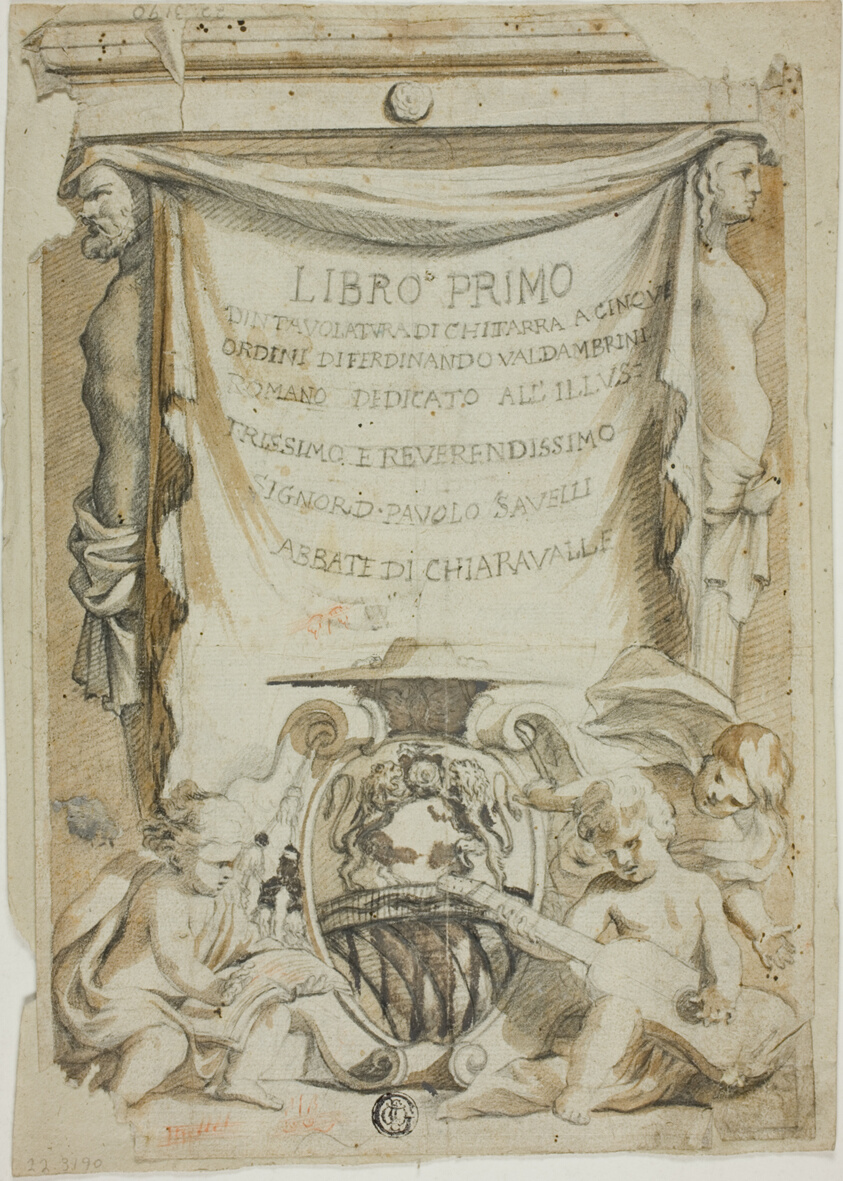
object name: Drawing and Watercolor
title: Design for Title-Page for Guitar Manual by Ferdinando Valdambrini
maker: Unkown artist; Italian, 17th century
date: c. 1646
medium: Pen and brown ink over black chalk, with touches of red crayon, on ivory laid paper, tipped onto ivory wove paper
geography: Italy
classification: graphite; drawings (visual works); prints and drawing